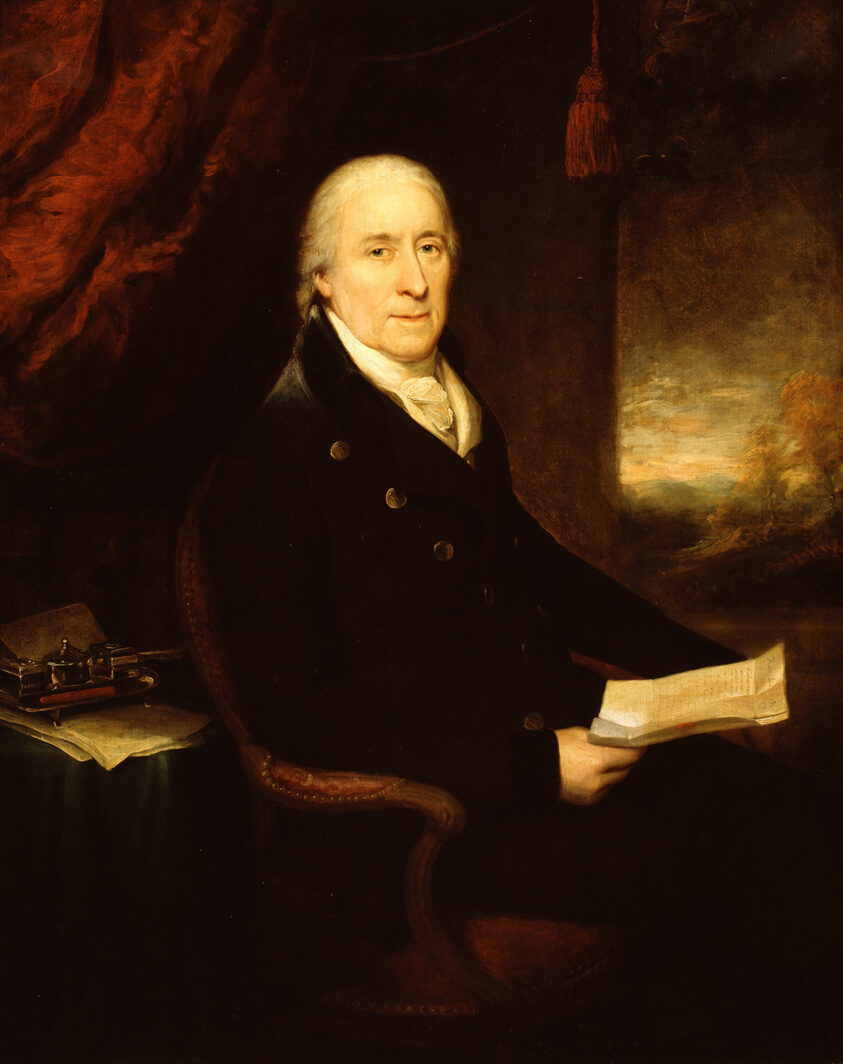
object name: Painting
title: Portrait of a Man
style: 18th Century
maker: Benjamin West (British, born United States, 1738–1820)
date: 1790/99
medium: Oil on canvas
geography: England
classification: oil on canvas; portrait; paint; oil paintings (visual works); british; painting; european painting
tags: portraits: male subject, portrait, portraits, man, table, letters (correspondence), curtains, red (color), chair, landscape, landscapes, trees, sky, nature, clouds, tassels